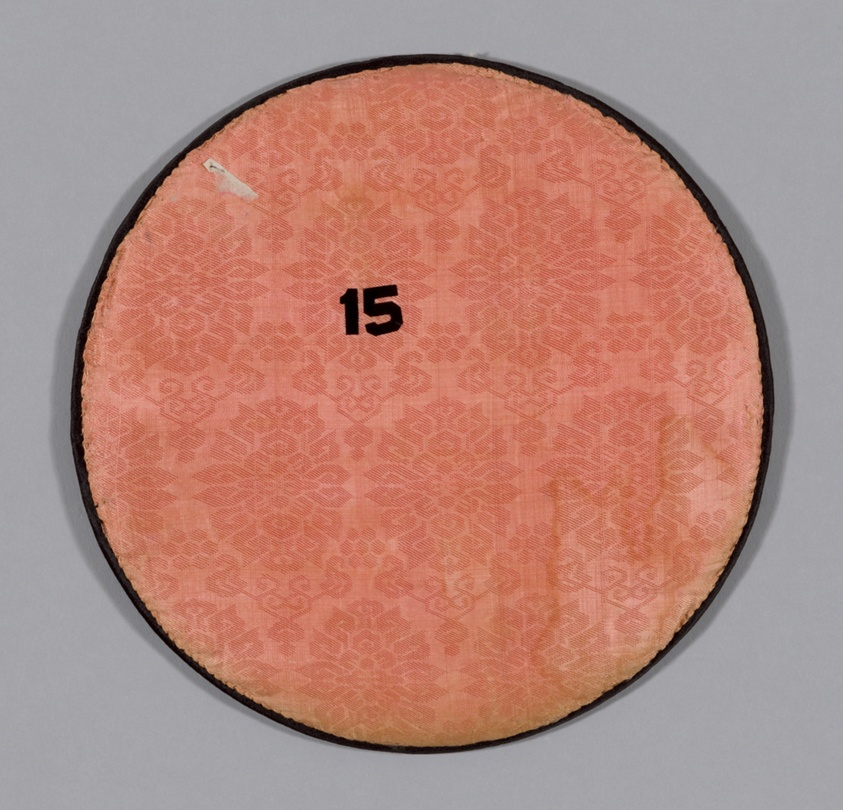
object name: Costume and Accessories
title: Mirror Case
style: qing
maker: China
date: Qing dynasty (1644–1911), 1875/1900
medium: Embroidered with figures on horseback, embroidery on gauze.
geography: China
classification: textile; needlework (visual works); accessories (object genre); weaving; costume